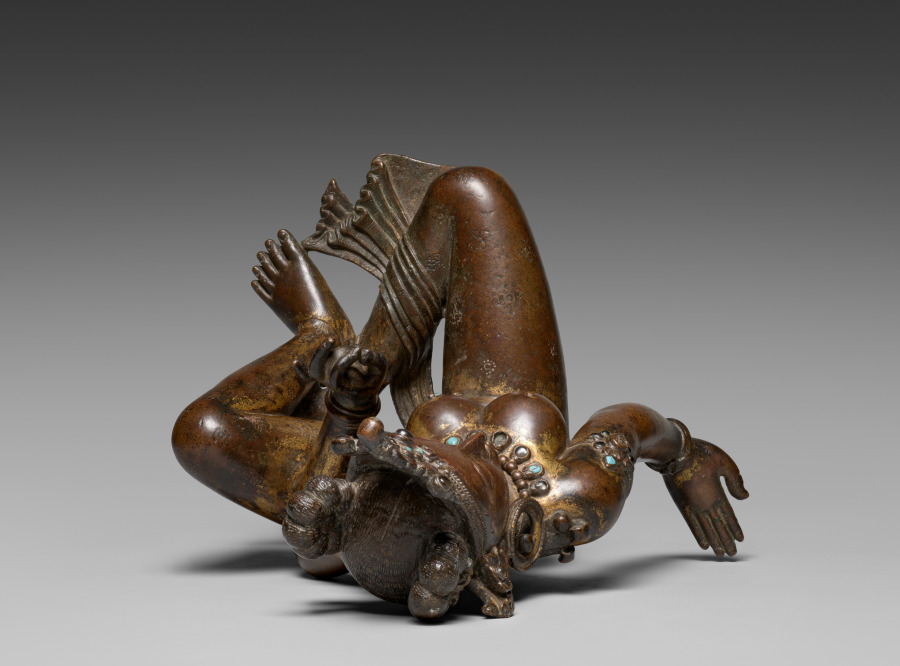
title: Goddess Uma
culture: Nepal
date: 1000s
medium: gilt bronze and semiprecious stones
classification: Sculpture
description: Uma is a mother goddess, and she is depicted here as turning toward her consort, the Hindu god Shiva, a companion sculpture from which this image of Uma has been separated. The grace and femininity of this solid-cast figure are balanced by her confident gesture and expression. She embodies the creative energy of god and the beauty of his creation. In Nepal, Hinduism and Buddhism have continued to flourish simultaneously, in contrast to Tibet, which is predominantly Buddhist, and India, where Buddhism was no longer practiced after the 14th century.